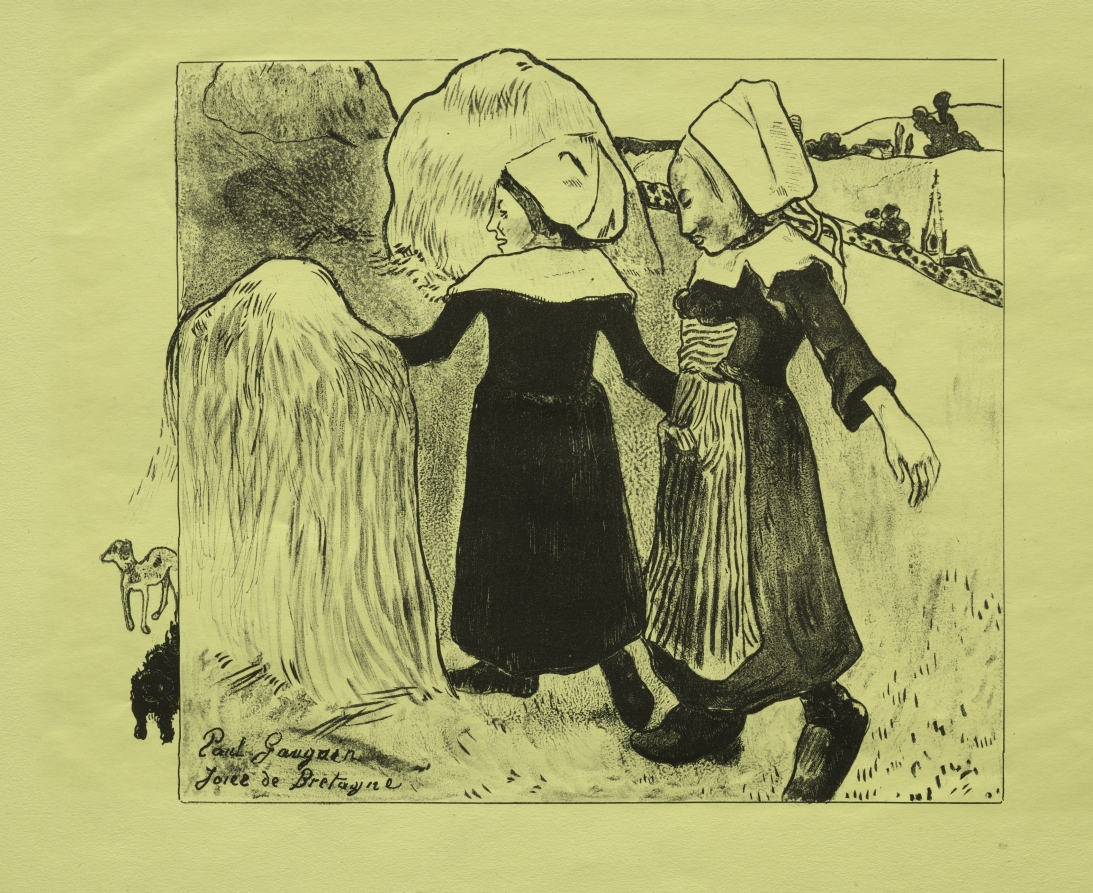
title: Volpini Suite: Joys of Brittany (Joies de Bretagne)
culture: France, 19th century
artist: Paul Gauguin (French, 1848–1903)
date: 1889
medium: zincograph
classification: Print